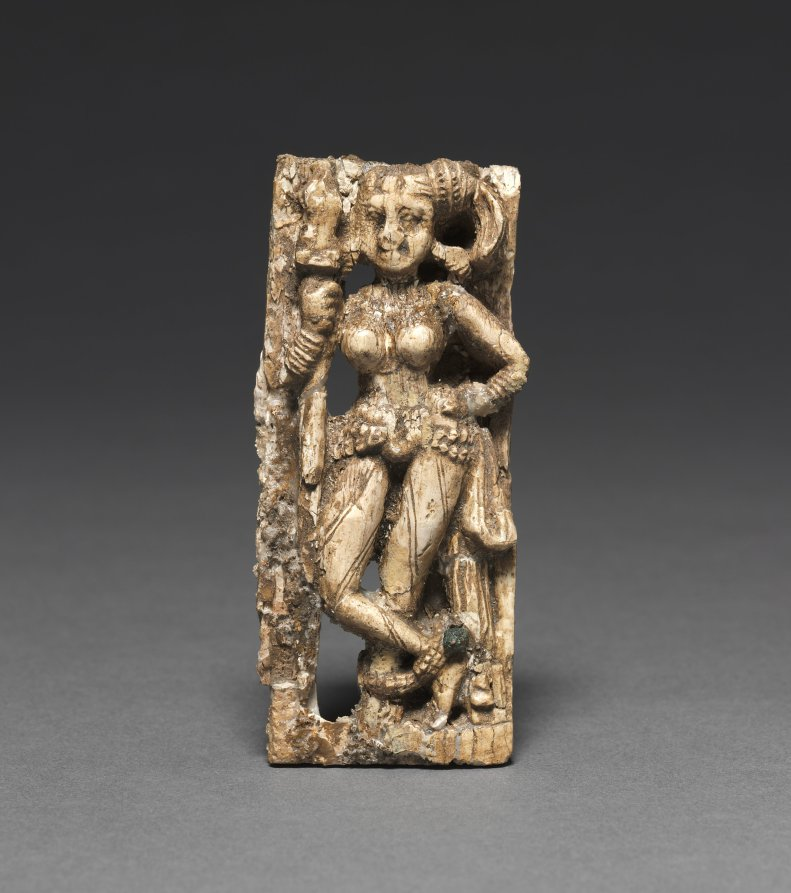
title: Young Woman with a Spear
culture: Afghanistan, Begram, Kushan period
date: c. 50–200 CE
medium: ivory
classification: Ivory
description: This smiling female figure has her hair tied up to one side, wound around with an embroidered strip of cloth. She stands akimbo with her upper garment removed and tied in a loose looped knot at her side. A broad girdle holds up her clinging, diaphanous skirt. She has the ideal female form of a young mother, and since she holds a spear, she may have served a protective function.